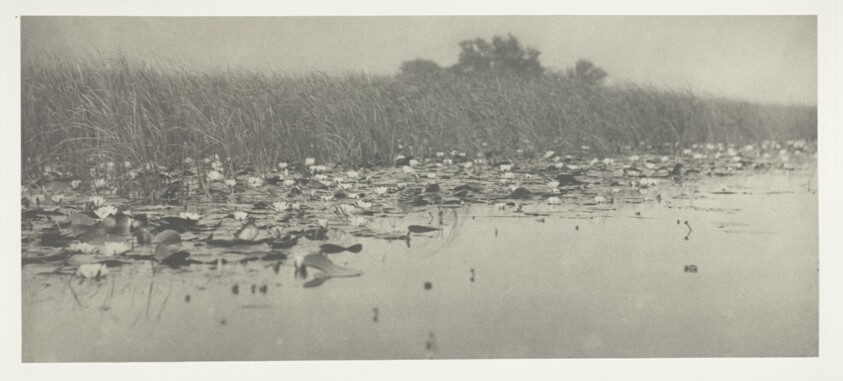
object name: Photograph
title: Water-Lilies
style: 19th century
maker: Peter Henry Emerson (English, born Cuba, 1856–1936)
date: 1886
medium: Platinum print, pl. VIII from the album "Life and Landscape on the Norfolk Broads" (1886)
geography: England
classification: platinum print; photographic process; photography; photograph